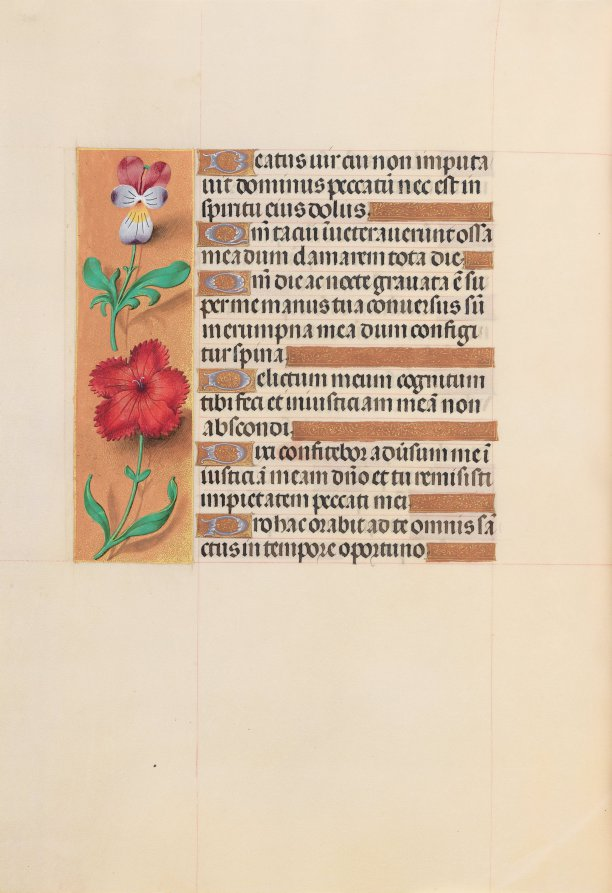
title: Hours of Queen Isabella the Catholic, Queen of Spain: Fol. 201v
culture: Flanders, Ghent and Bruges, late 15th century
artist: Master of the First Prayerbook of Maximillian (Flemish, c. 1444–1519)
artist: and Associates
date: c. 1500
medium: ink, tempera, and gold on vellum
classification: Bound Volume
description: This manuscript was illuminated by a circle of at least five highly organized manuscript painters active in the Flemish cities of Ghent and Bruges. The principal illuminator was Alexander Bening, who painted the majority of the book's miniatures. Manuscripts produced by this circle of artists are renowned for the decoration of their borders, which typically feature a rich variety of realistically-painted flowers, birds, and butterflies. This prayer book, called a book of hours, was intended not for a cleric, but for the private devotions of a lay person-in this case, Isabella the Catholic, Queen of Spain (1451-1504). Isabella's coat of arms embellishes the book's frontispiece. It is unlikely that the book was commissioned by the Queen herself; rather, she probably received it as a diplomatic gift from someone courting her patronage, perhaps Cardinal Francisco Jimenez de Cisneros. A Franciscan friar, Jimenez was dependent upon Isabella for his advancement, first to the post of Queen's confessor in 1492, and then to Archbishop of Toledo in 1495.